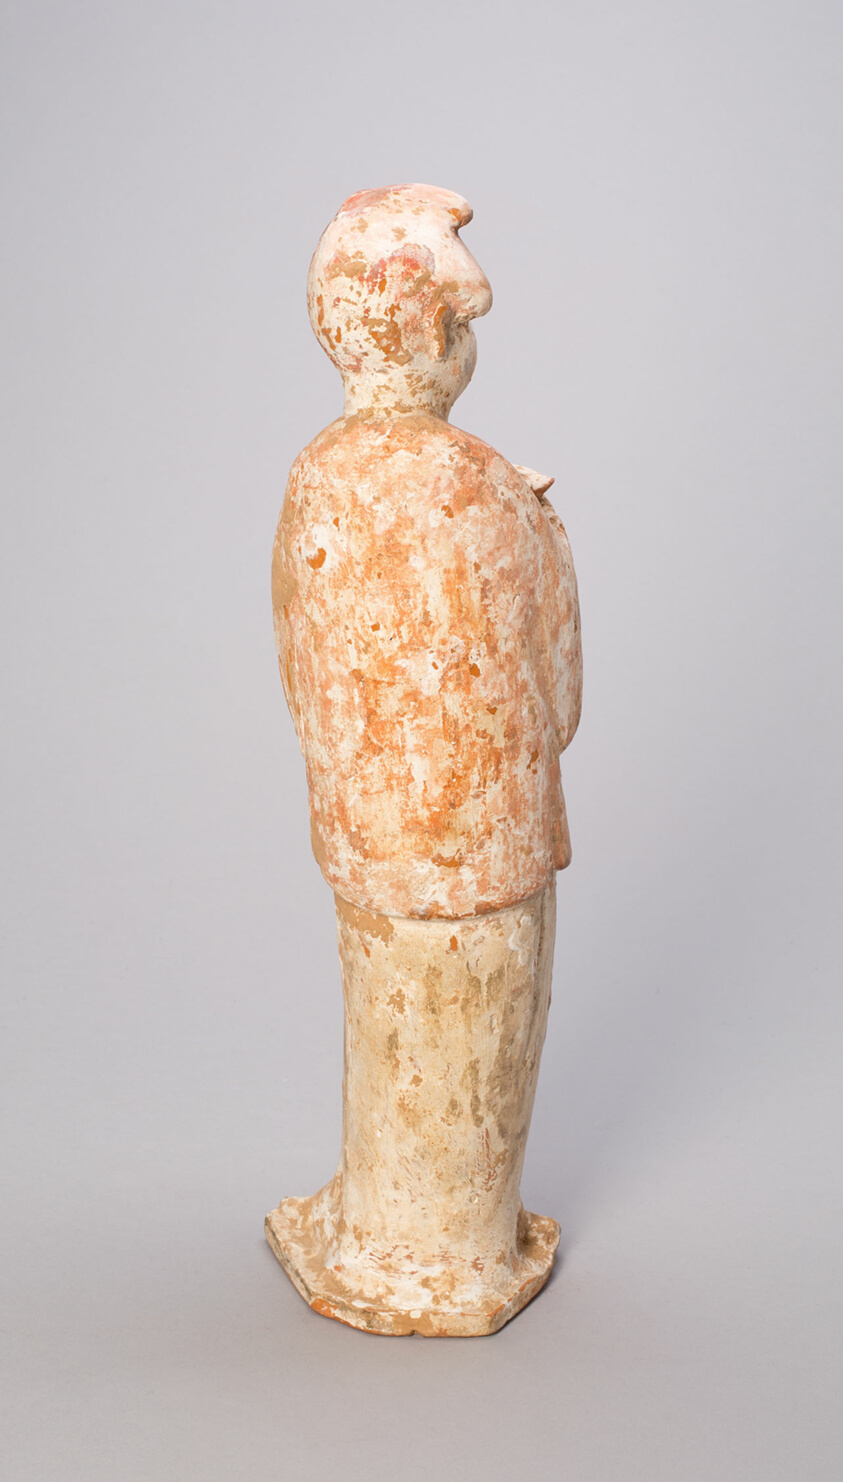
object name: Sculpture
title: Woman Holding a Bird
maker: China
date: Tang dynasty (618–907)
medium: Earthenware with traces of pigment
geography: China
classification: ceramics; asian art; sculpture